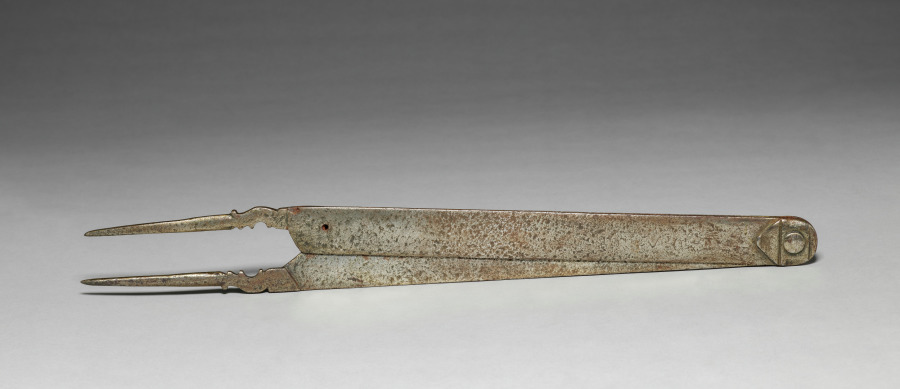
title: Dividers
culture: Germany or France, 17th century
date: 1600s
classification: Tool